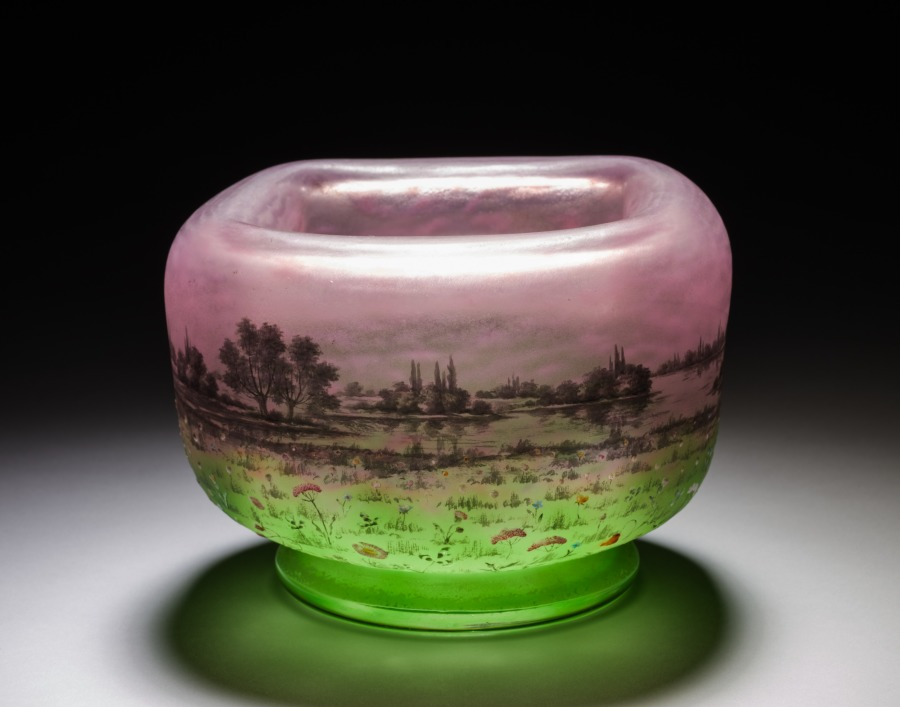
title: Bowl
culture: France, Nancy, late 19th-early 20th Century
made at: Daum Brothers (French)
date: late 1800s - early 1900s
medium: glass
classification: Glass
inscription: signed on bottom: Daum Nancy.